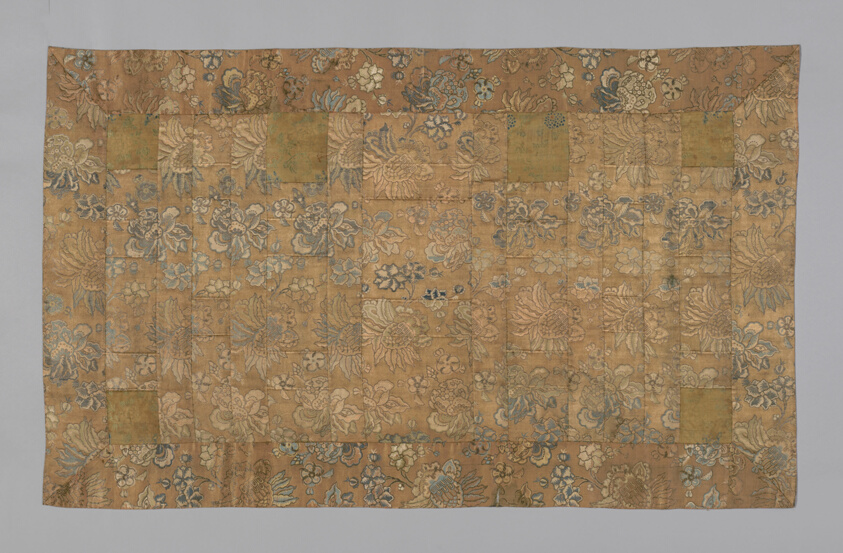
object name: Textile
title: Kesa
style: late edo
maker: Japan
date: late Edo period (1789–1868), 1792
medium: Hiri, yô, jô: silk and gold-leaf-over-lacquered-paper strip, warp-float faced 4:1 satin weave with weft-float faced 1:2 ‘Z’ twill interlacings of secondary binding warps and supplementary patterning wefts; shiten and niten: silk, plain weave with supplementary patterning wefts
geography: Japan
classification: textile; weaving; liturgical - buddhist